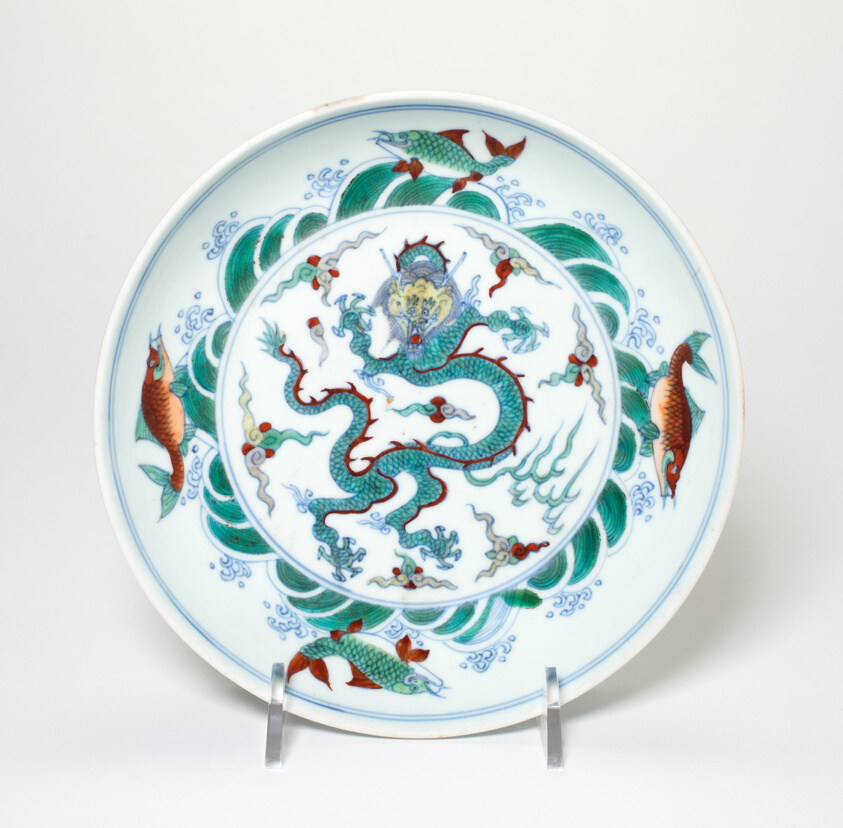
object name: Vessel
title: Dish with Dragon amid Flames Encircled by Fish amid Waves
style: Chinese (culture or style)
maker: China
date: Qing dynasty (1644–1911), 18th/19th century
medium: Porcelain painted in underglaze blue and overglaze enamels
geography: China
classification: dish (vessel); porcelain; asian art; ceramics; vessel